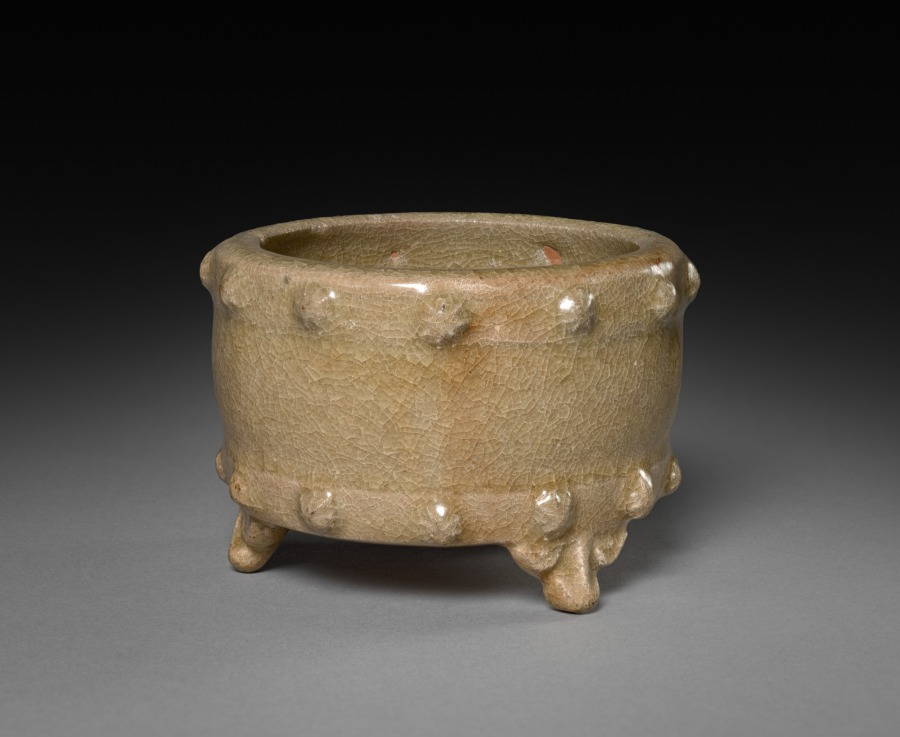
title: Incense Burner: Southern Celadon Ware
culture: China, Yuan dynasty (1271-1368)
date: 1271–1368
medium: glazed buff stoneware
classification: Ceramic